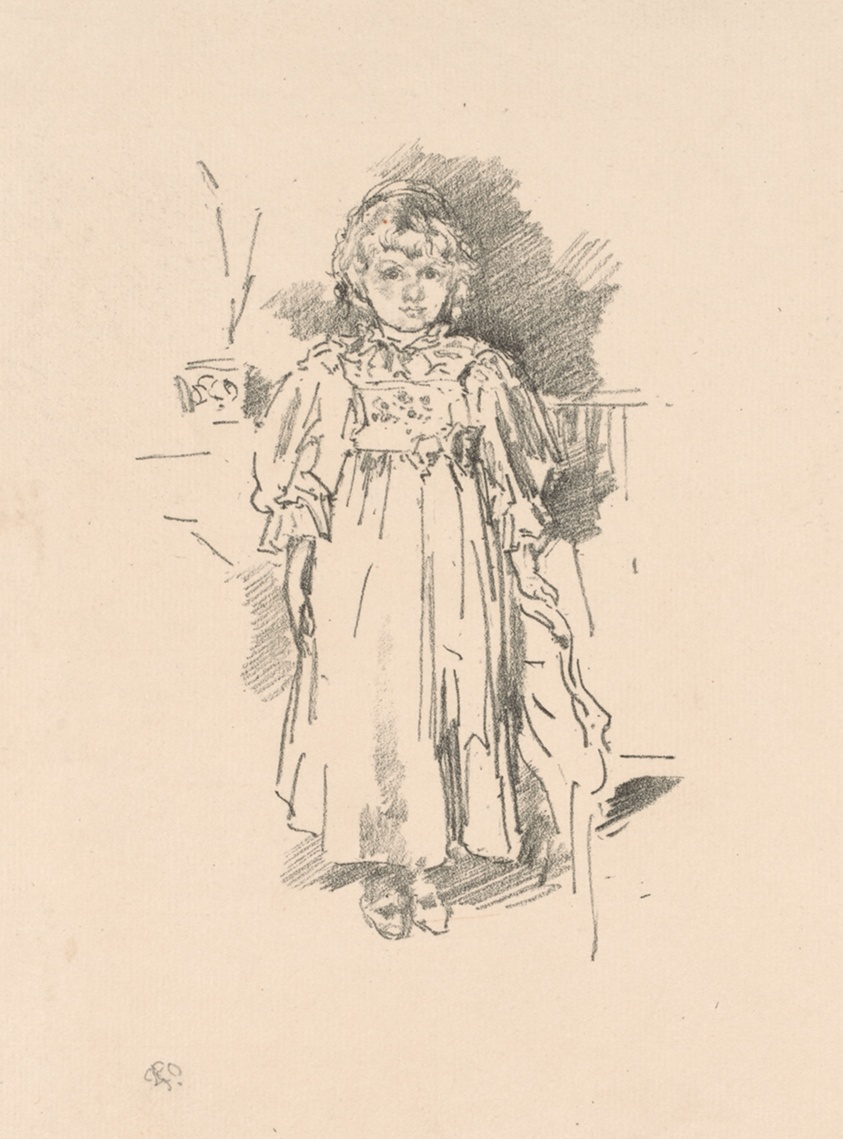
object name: Print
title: Little Evelyn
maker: James McNeill Whistler (American, 1834-1903)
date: 1896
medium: Transfer lithograph in black on cream laid paper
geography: United States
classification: transfer lithograph; lithograph; print; prints and drawing; paper